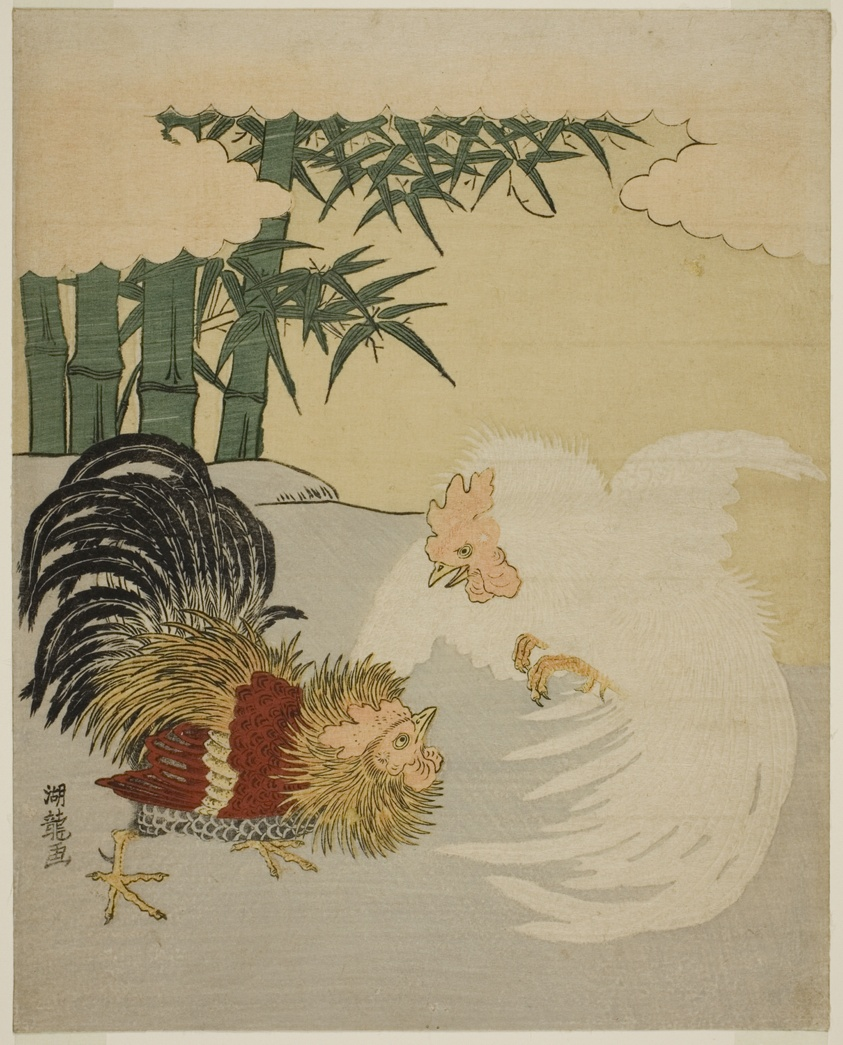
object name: Print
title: Cocks Fighting near Bamboo Grove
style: Japanese (culture or style)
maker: Isoda Koryusai (Japanese, 1735-1790)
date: c. 1770s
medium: Color woodblock print; chuban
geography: Japan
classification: woodblock print; print; asian art